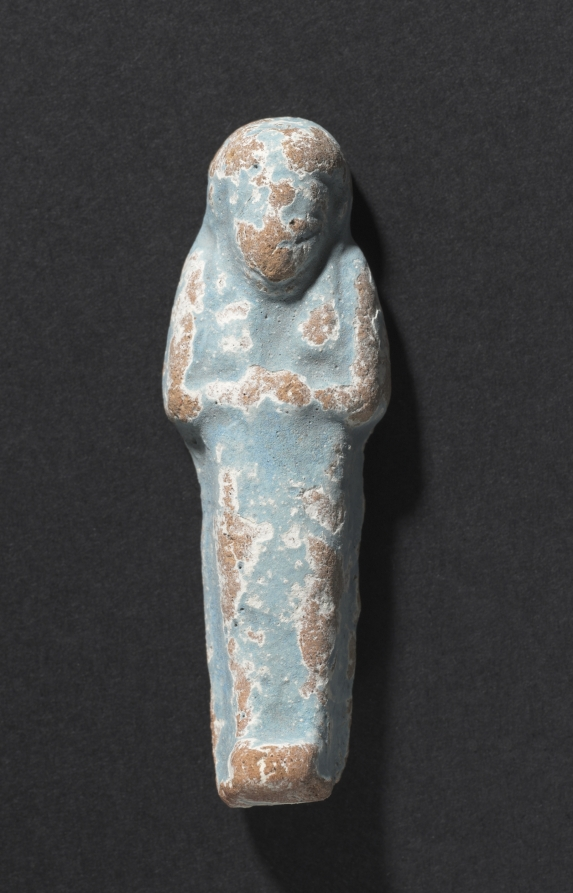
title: Shawabty of Ditamenpaankh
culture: Egypt, Late period (715–332 BCE), Dynasty 25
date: 715–656 BCE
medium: terracotta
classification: Funerary Equipment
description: High demand for shawabtys in the Late Period, a time when as many as 400 or more shawabtys were placed in the tomb with the deceased, gave rise to a specialized container for storing them: the shawabty box. This example is inscribed for the lady of the house, Ditamenpaankh, and was probably one of a pair originally made for her. The single-masted boat on the box's lid is perhaps an allusion to the pilgrimage of the deceased to the holy city of Abydos, the cult city of Osiris, king of the dead. The shawabtys inside are crude, mass-produced examples cast in an open mold. Made of terracotta, their blue paint imitates more costly shawabtys made of faience. As for the shawabty spell, it has been removed from its traditional location on the shawabty's front and relocated onto the sides of box, where it needed only to be written once, thus expediting production.